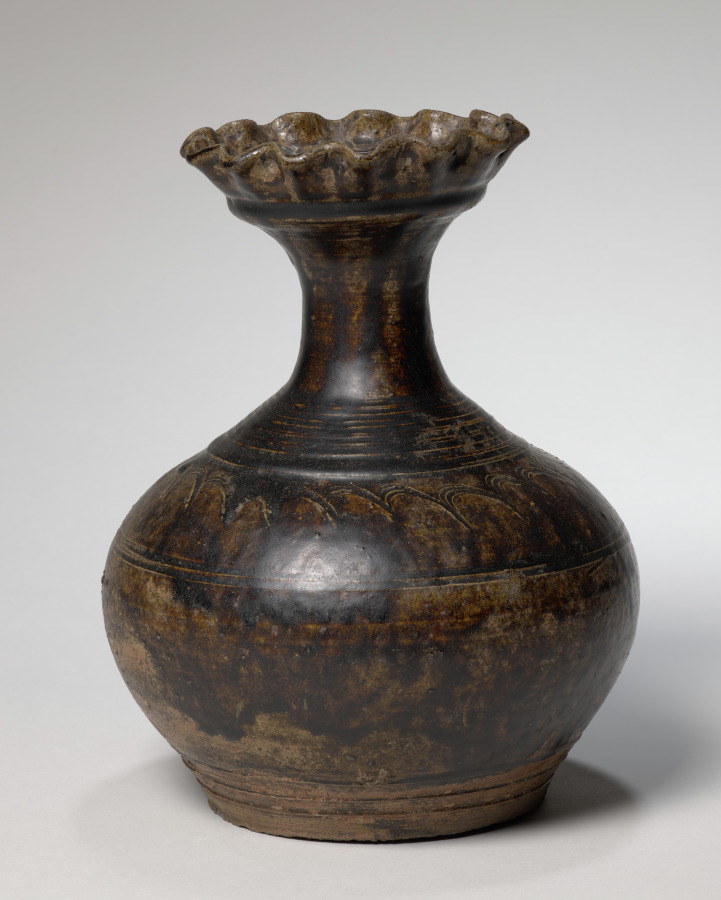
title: Khmer Vase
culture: Cambodia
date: 1100s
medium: earthenware with dark brown glaze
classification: Ceramic